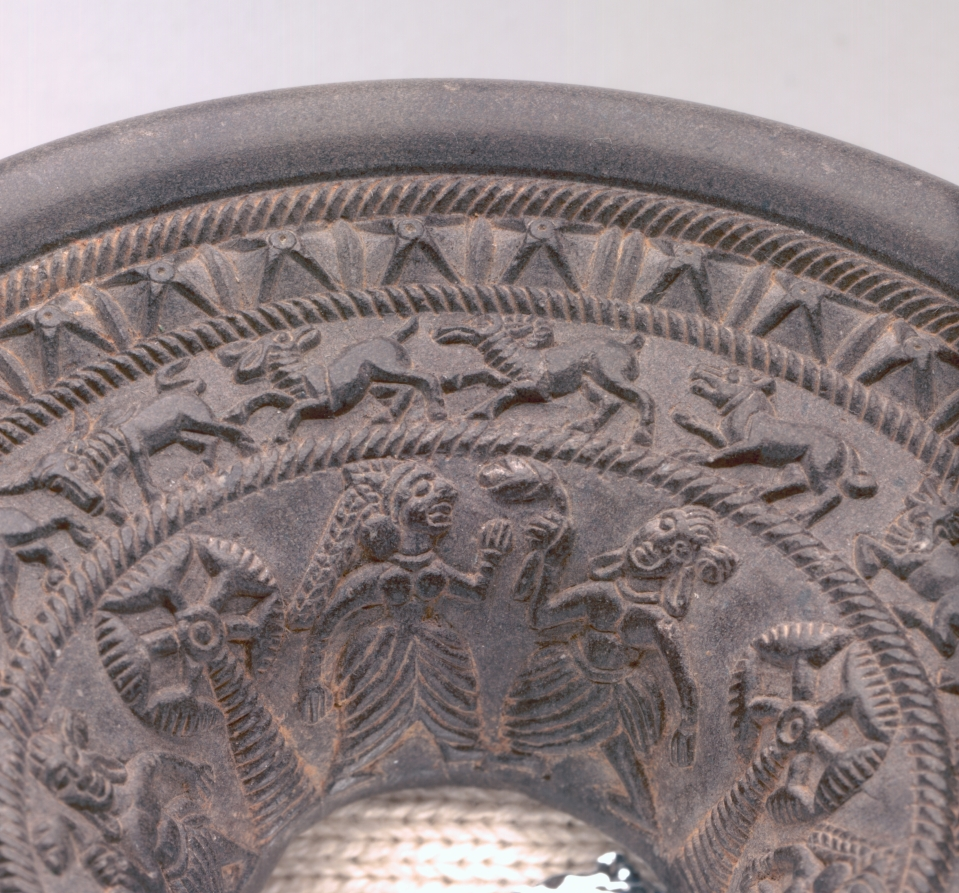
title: Ringstone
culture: India, Maurya period (322–185 BCE)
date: 200s BCE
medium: steatite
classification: Sculpture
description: Ringstones are among the earliest works of art to be created in stone during India's historical period. This example is finely carved with detailed images of affectionate couples and palm trees, running animals, and geometric motifs in concentric circles. The function of ringstones remains uncertain, since none of the surviving examples is inscribed or explained in a text.